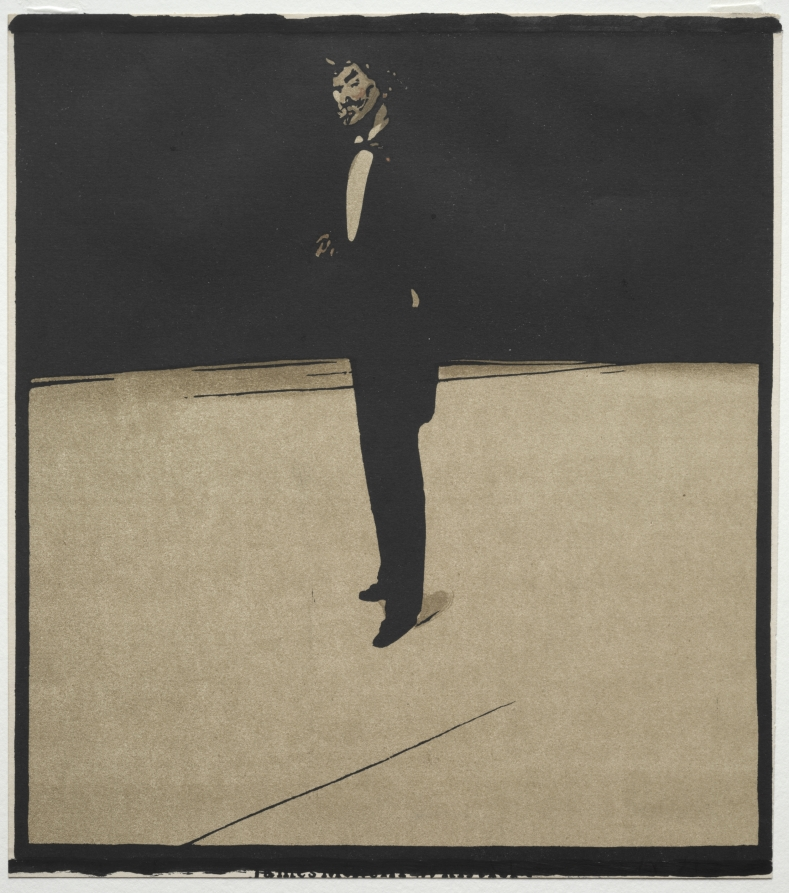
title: James MacNeill Whistler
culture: England, late 19th-early 20th century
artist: William Nicholson (British, 1872–1949)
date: 1899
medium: lithograph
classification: Print